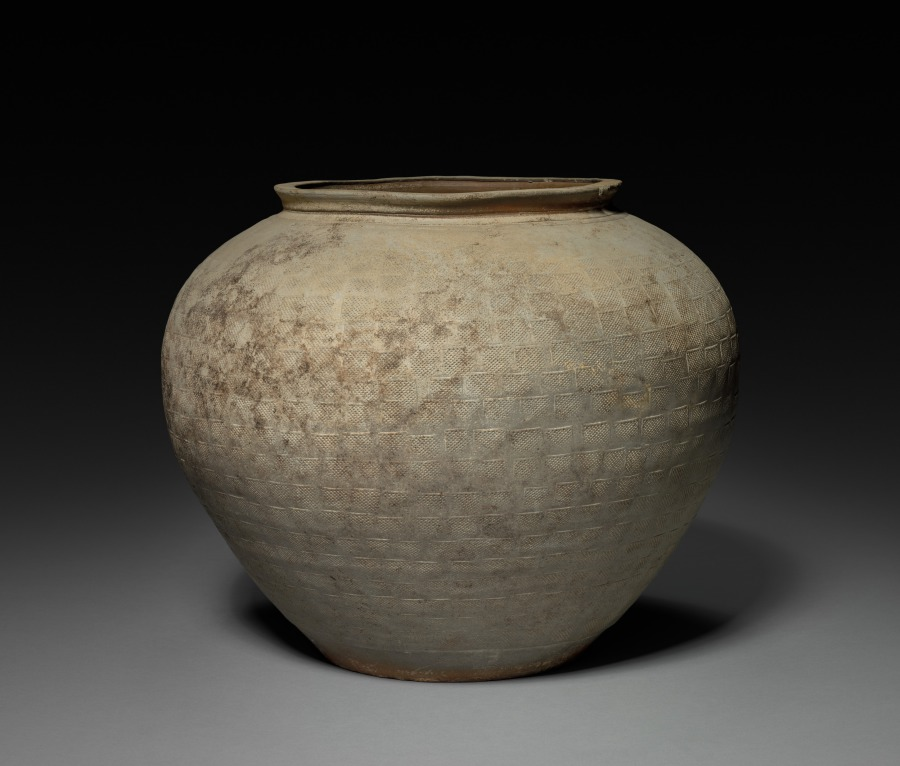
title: Jar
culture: China, Zhejiang province, Eastern Han dynasty (25–220 CE)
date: 25–220 CE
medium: stoneware with impressed decoration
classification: Ceramic